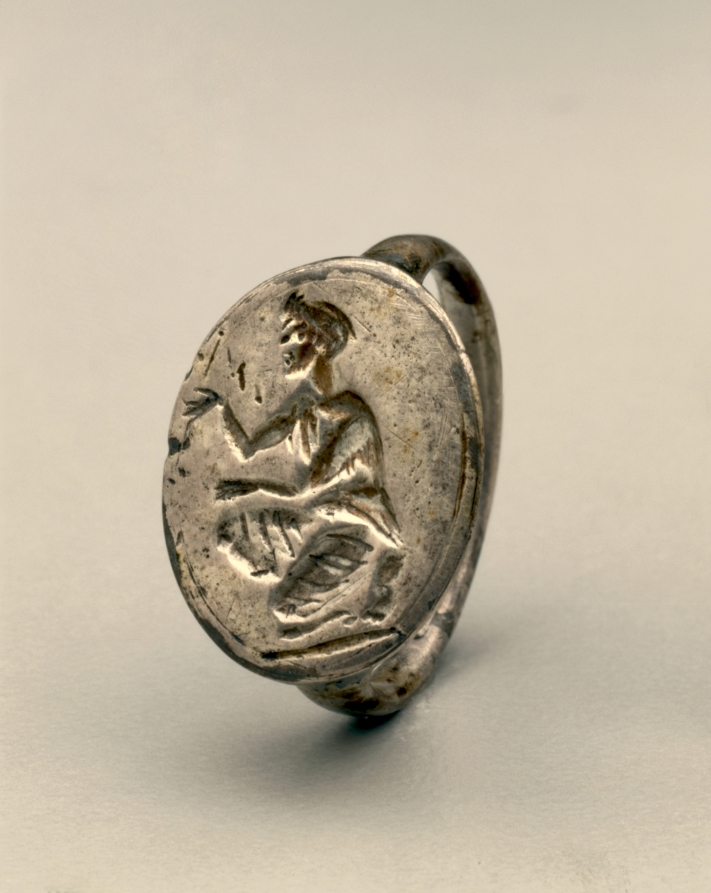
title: Finger Ring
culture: Greece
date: 300s BCE or later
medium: silver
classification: Jewelry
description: This silver signet ring depicts a kneeling figure facing left in a heavy robe, with hands outstretched and wearing a headdress. The figure is probably a priest or priestess making an offering at an unseen altar. Less skilled carving and the worn surface make the image difficult to interpret, especially the object in the figure’s right hand.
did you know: When signet rings were stamped, the image would be reversed on the stamped surface.